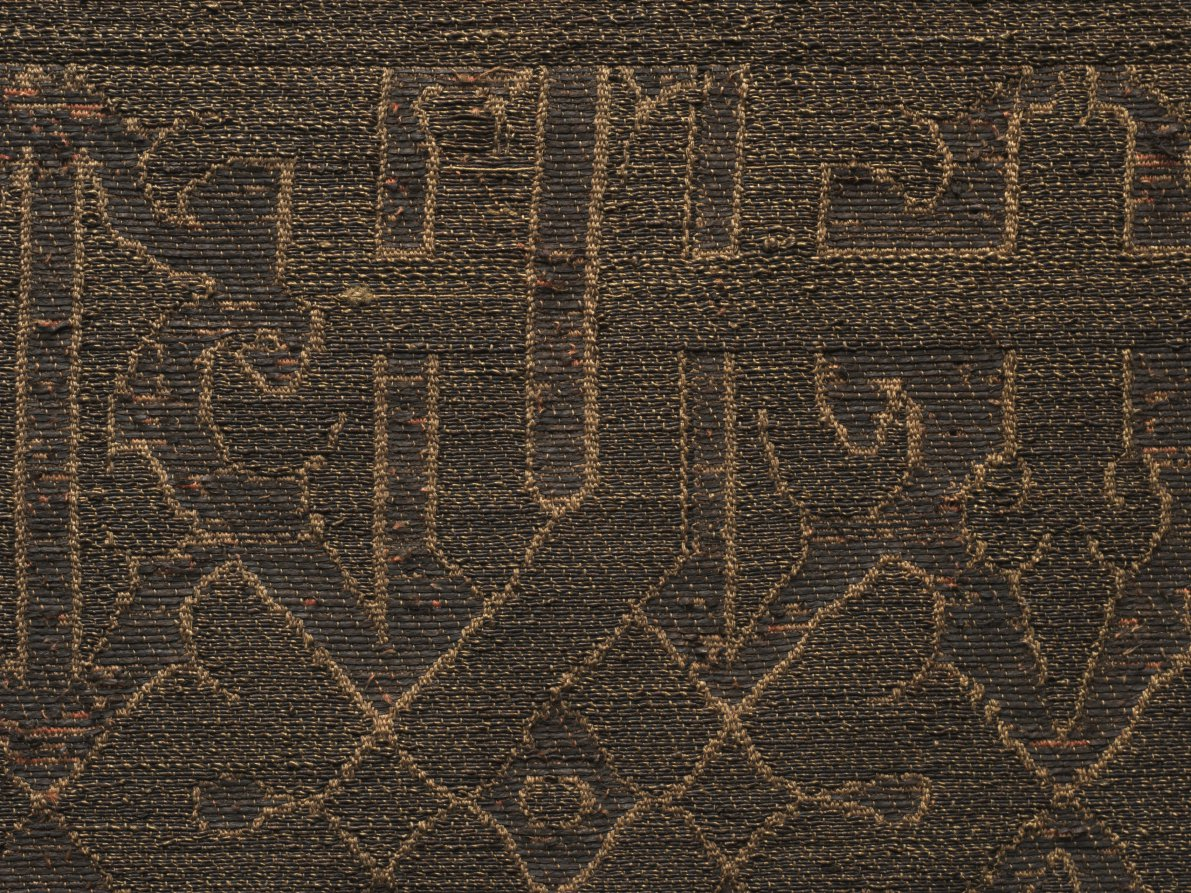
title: Cloth of gold with felines and eagles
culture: Northeast Iran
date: 1225–75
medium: Silk and gold thread: lampas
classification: Textile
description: Mongol taste for luxury was equated with gold, symbol of imperial authority, power, and legitimacy. This splendid cloth of gold-exceptionally large and luxurious-may have enriched the interior of a palace or a majestic tent. The golden pattern, although tarnished on the faded red silk ground, features scalloped medallions with felines whose long tails terminate in dragons’ heads amid elegant floral vines. Double-headed eagles form interstitial motifs on the floral ground. A radiant gold-on-gold band of pseudo-Arabic script enriches the top, woven with gold strips wrapped around a silk core on a ground of flat strips of gold, immediately beneath the pattern testing area.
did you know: Mongol cloths of gold, called nasji, incorporate Iranian, Central Asian, and Chinese features, reflecting the effects of gift exchanges and international commerce.